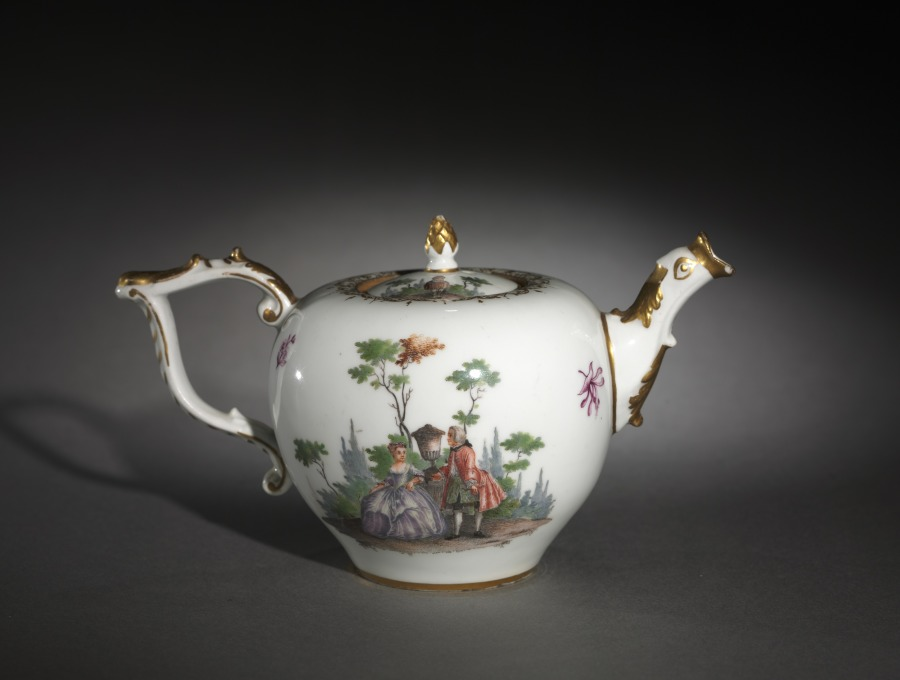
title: Teapot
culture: Germany, Meissen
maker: Meissen Porcelain Factory (German, est. c. 1710)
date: c. 1750–70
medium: porcelain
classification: Ceramic